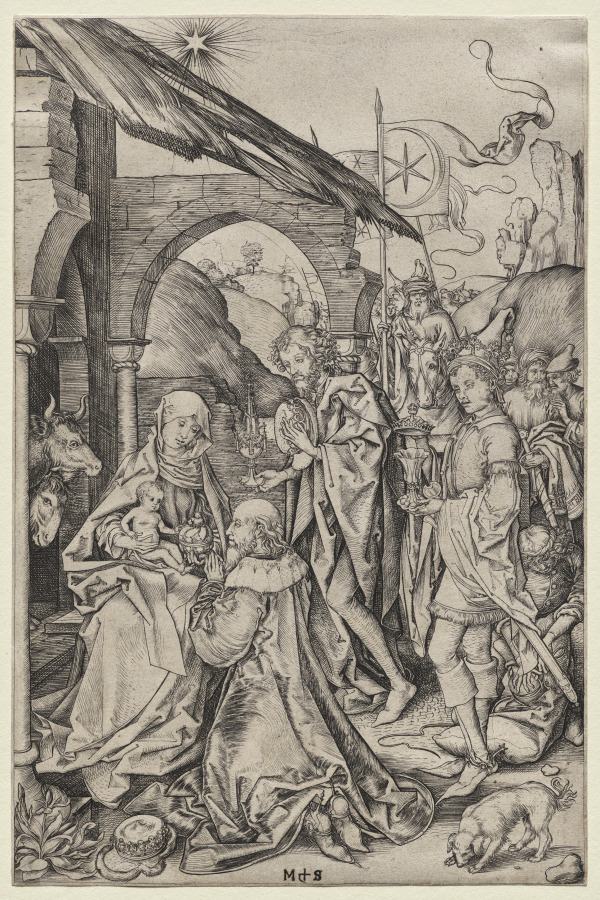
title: Adoration of the Magi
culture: Germany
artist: Martin Schongauer (German, c. 1450–1491)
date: 1482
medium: engraving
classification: Print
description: The print belongs to a set of four engravings considered to be an incomplete series of episodes of the Life of the Virgin, which also includes the Nativity (1939.448), The Flight into Egypt (1954.260), and The Death of the Virgin (1956.744). Here, Martin Schongauer portrayed the visit of the three magi and their long retinue as witnesses to the miraculous birth of Jesus Christ as recounted in the biblical book of Matthew. The Virgin Mary is seated in front of the entrance of a stable made up from the ruins of a building. She holds the Christ child on her lap and hands him a box containing gold, the gift from the oldest of the three Kings, Melchior, who is kneeling in front of them. Behind Melchior are the other two Kings, Caspar and Balthazar, who offer a censer in the shape of a Gothic monstrance and a goblet of myrrh, respectively. At the top of the roof of the stable, the star of Bethlehem blazes.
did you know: Late medieval depictions of the adoration of the magi such as this often depicted the magi Balthazar as a black African as seen here.